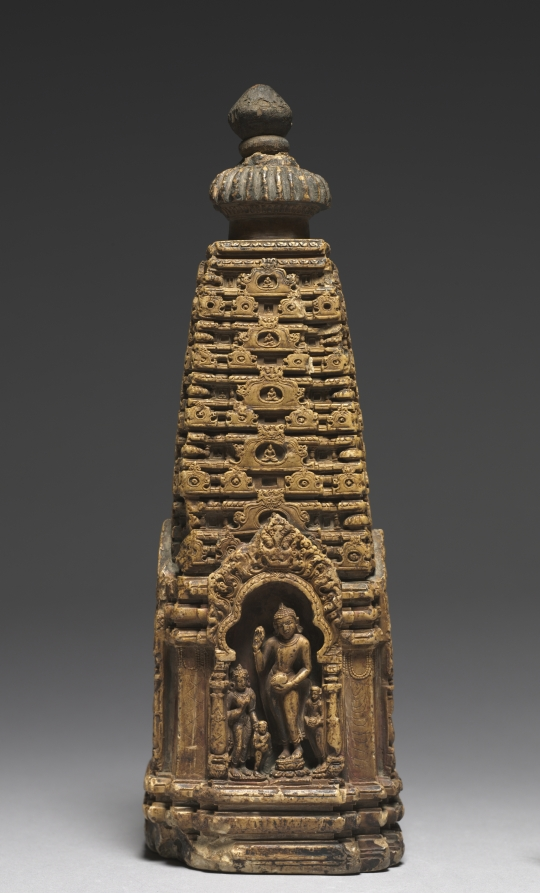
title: Portable Buddhist Temple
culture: Eastern India, Bihar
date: 900s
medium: Kaolin with traces of pigment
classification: Sculpture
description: The large niches on each side contain scenes from the life of the Buddha. The first features his mother Maya after his miraculous birth. The second and fourth depict his triumph over the forces of evil that attempted to frighten and seduce him away from the path to enlightenment. The third scene takes place after he has established a monastic following and depicts his wife bringing their son to meet him. Kaolinite is a compacted mineral that approximates ivory in its ability to be carved with fine details. Visitors to sacred Buddhist sites would commission portable sculptures such as this to commemorate their pious pilgrimage.